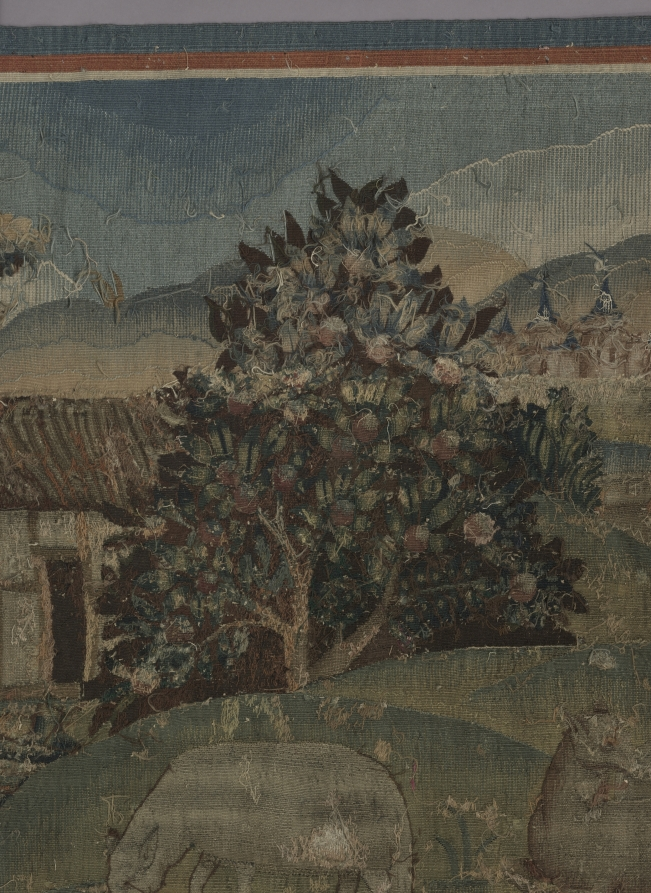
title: Shepherds in a Round Dance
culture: Netherlands, early 16th century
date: around 1500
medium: Wool and silk: tapestry weave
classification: Tapestry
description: Late medieval tapestries often use a limited yet contrasting color palette to portray stylized images. The expressions of these figures, for example, are conveyed more by their postures than by their faces. Four shepherds and shepherdesses join hands and dance to the music of a bagpiper at the far right, while a lord and two ladies on the left look on. A dog and sheep amid blossoming plants and trees contribute to the festive pastoral scene in front of a castle.